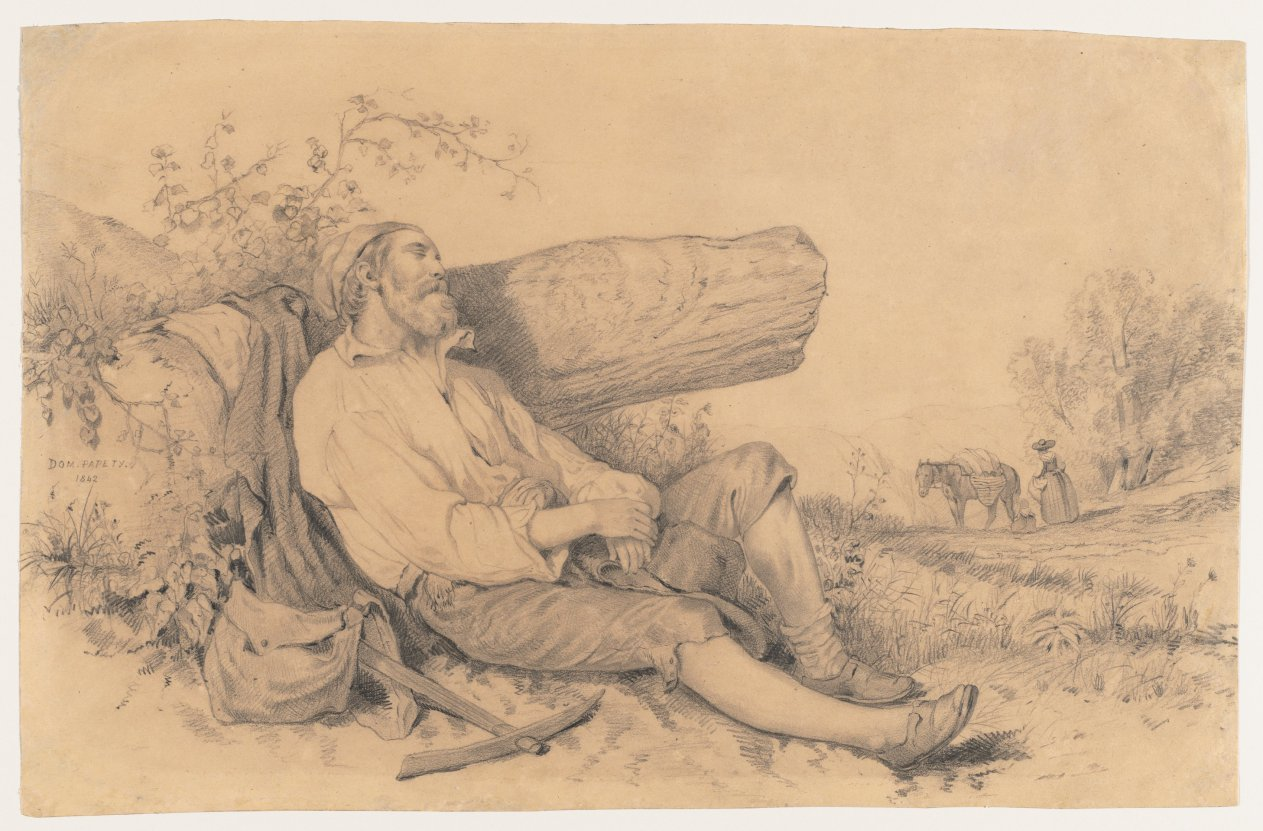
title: Sleeping Field Worker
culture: France, 19th century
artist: Dominque Louis Papety (French, 1815–1849)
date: 1842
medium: graphite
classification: Drawing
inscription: Signed and dated center left in graphite: Dom. Papety, 1842